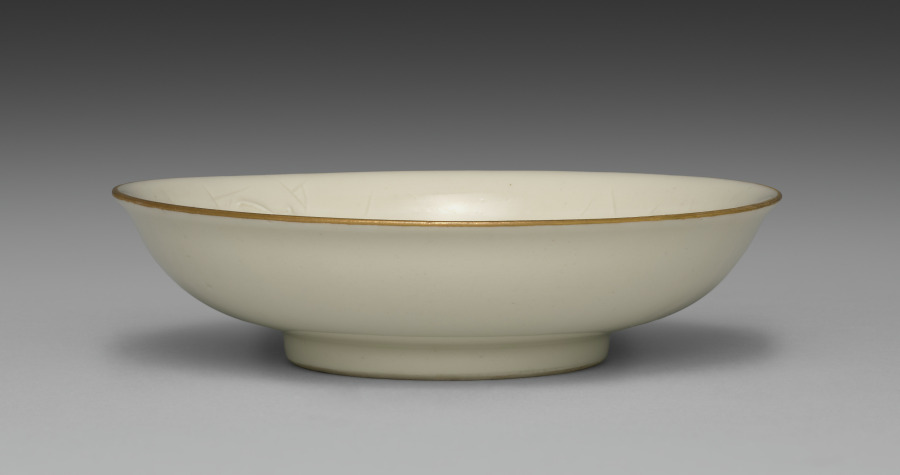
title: Small Dish from Dining Set with Plum Blossoms and Cracked-Ice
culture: Japan, Meiji period (1868–1912)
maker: Seifū Yohei II (Japanese, 1844–1878)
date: c. 1875–78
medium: Porcelain with molded designs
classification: Ceramic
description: Each item in this set has a delicate low-relief design of flowering plum branches over scattered, intersecting lines meant to resemble the cracked-ice surface of a frozen body of water and is signed on the base in gold pigment. While Yohei II produced many fine works in underglaze blue, like those produced by Kiyomizu Shichibei, he also made works in quite different styles later in his career, from the early 1870 s. In 1873, he was appointed purveyor to the Industrial Center of Kyoto Prefecture, a designation associated with Kyoto’s efforts to reach an international market through the port of Kobe; and from 1875 until his death, he was involved in national-level projects to present Japanese ceramics across the world. It was during this period that Yohei III was apprenticed to Yohei II, and it has been suggested that this set may in fact be an early example of Yohei III’s work, which he signed with his teacher’s name. Decorated with flowers resembling Japanese textile motifs, the set calls to mind the design of Yohei II’s pair of vases with plum blossoms in the Victoria and Albert Museum. Here, the elaborate trees created for a formal public exhibition setting have been translated into the approachable blossoms of the genteel domestic environment. While the designs are consistent across the pieces, each raised flower petal and pistil and each incised line in the ice was done by hand, so the cups, bowls, and dishes are similar yet unique. The bottoms of two boxes once identified the set’s owner, but the information has been deliberately obscured with black ink. However, inscriptions still visible appear to indicate two occasions, once at the end of July 1886 , and once again in June 1916 , when parts of the set were requested from Hokura in Niigata Prefecture. The location corresponds to a neighborhood in the present-day city of Jōetsu. The surname Tsuji 辻 also appears on a paper tag affixed to one of the box cloths. Future research may possibly reveal more about their provenance. A vase by Yohei III in a private collection combines the formal grandeur of the Yohei II vases in the Victoria and Albert Museum with the gentler design of this dining set, placing flowering plum trees against soft, scalloped-edge clouds resembling those in golden screens.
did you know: The dining wares have a creamy white coloration that the four boxes containing them identify as Korean in style.